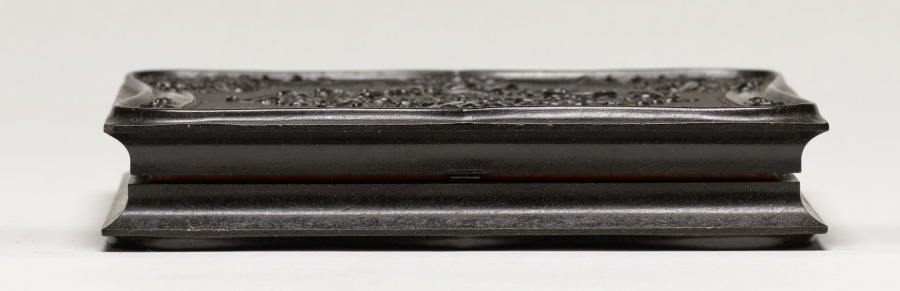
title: Child with Drum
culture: America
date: 1850s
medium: daguerreotype, quarter-plate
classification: Photograph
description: For this finely toned daguerreotype, an unknown photographer skillfully manipulated a bulky camera into a low vantagepoint, ensured even lighting, and positioned the quaintly dressed subject against a neutral background to create a charming portrait. The child was carefully coached to stare directly into the lens and to hold the toy drum and drumsticks convincingly. Perhaps the drum is meant to recall earlier times in American history and to symbolize its fight for independence.